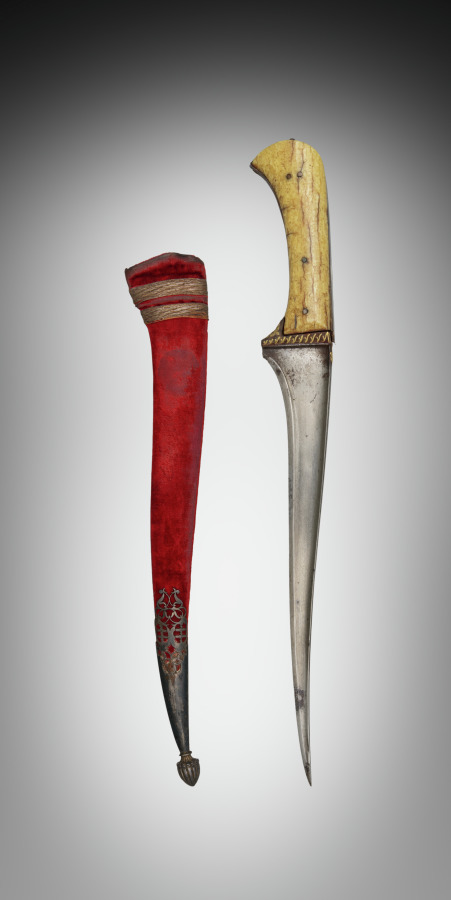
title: Knife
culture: Afghanistan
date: 1700s–1800s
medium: inlaid gold with ivory hilt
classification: Arms and Armor